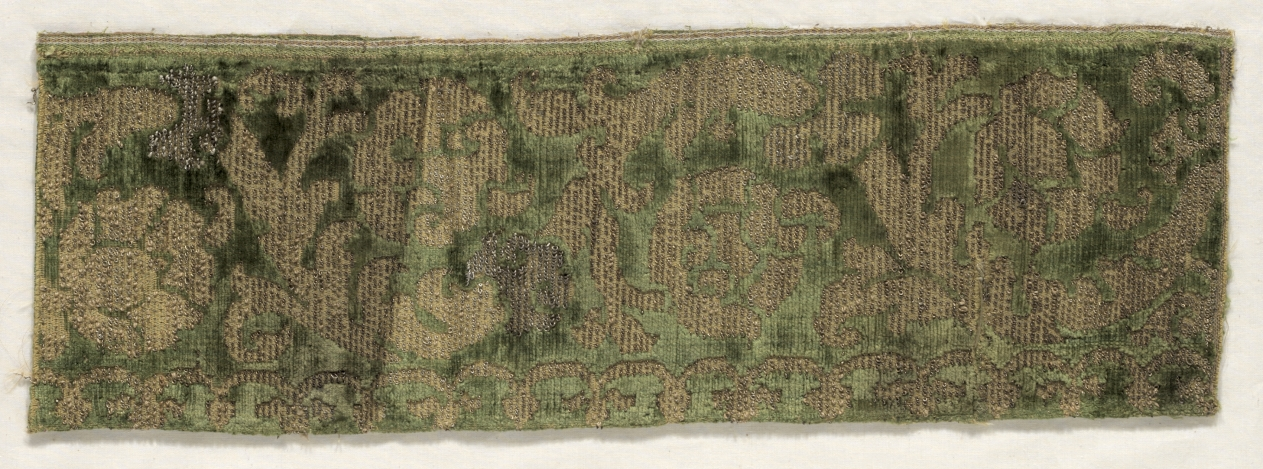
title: Velvet Textile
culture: Spain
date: 16th century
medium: velvet; silk and metallic thread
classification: Velvet